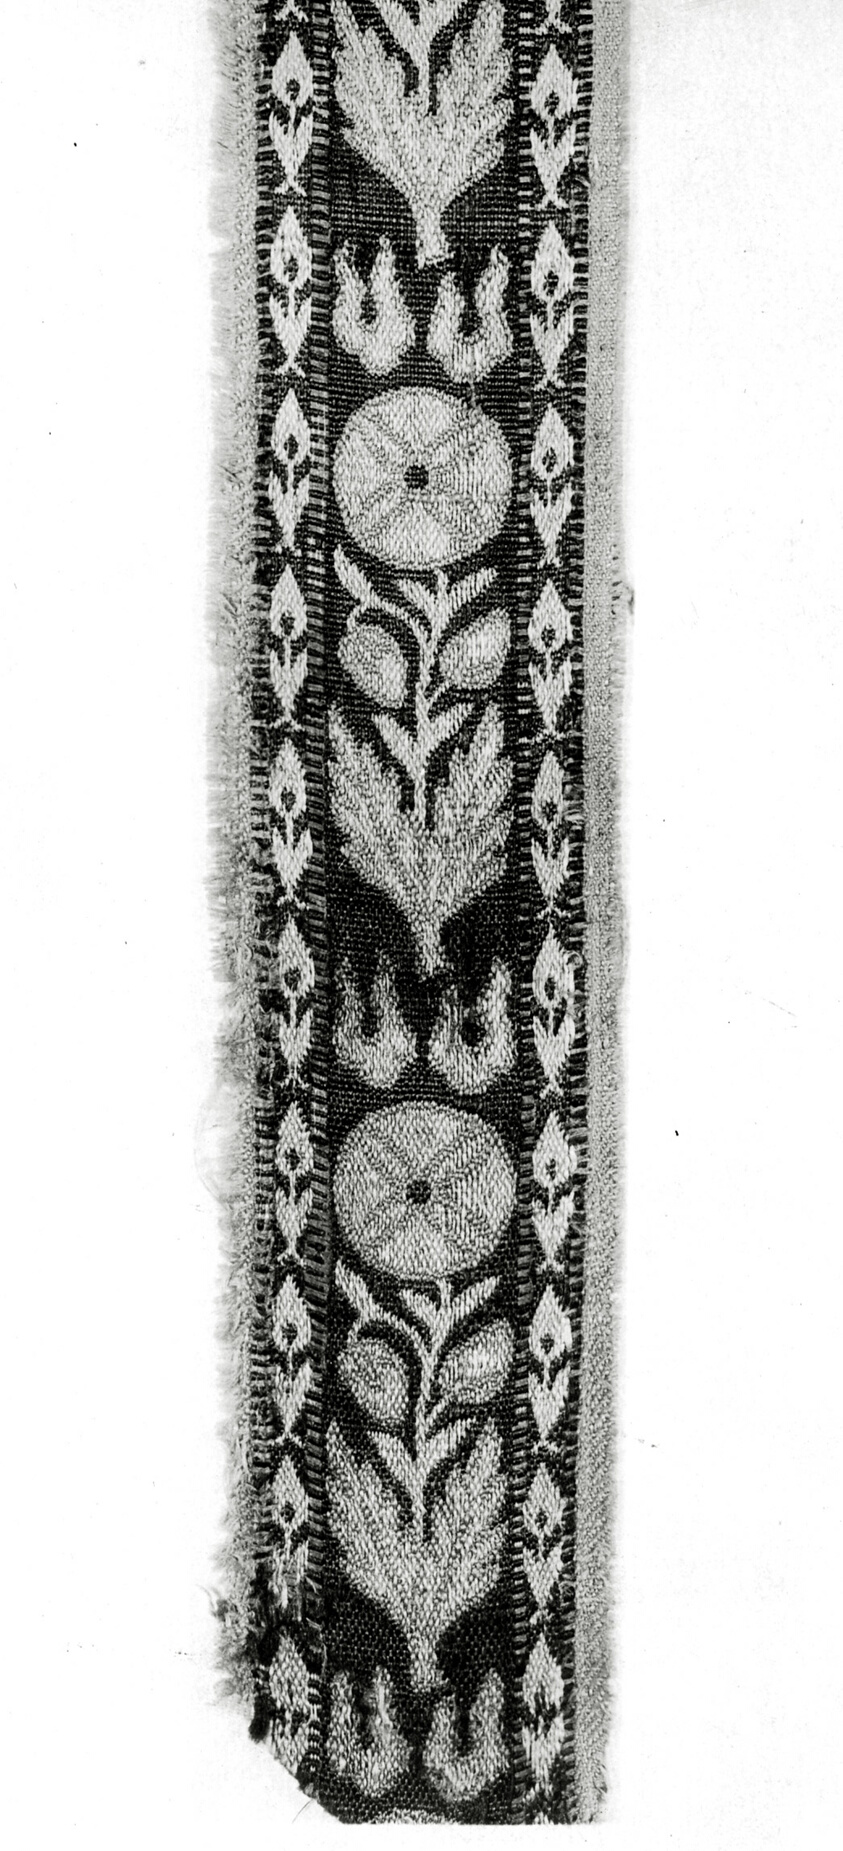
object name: Textile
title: Fragment (Border)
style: isfahan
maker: Iran (Persia, Isfahan)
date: 18th century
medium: Brocaded compound cloth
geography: Iran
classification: textile; weaving